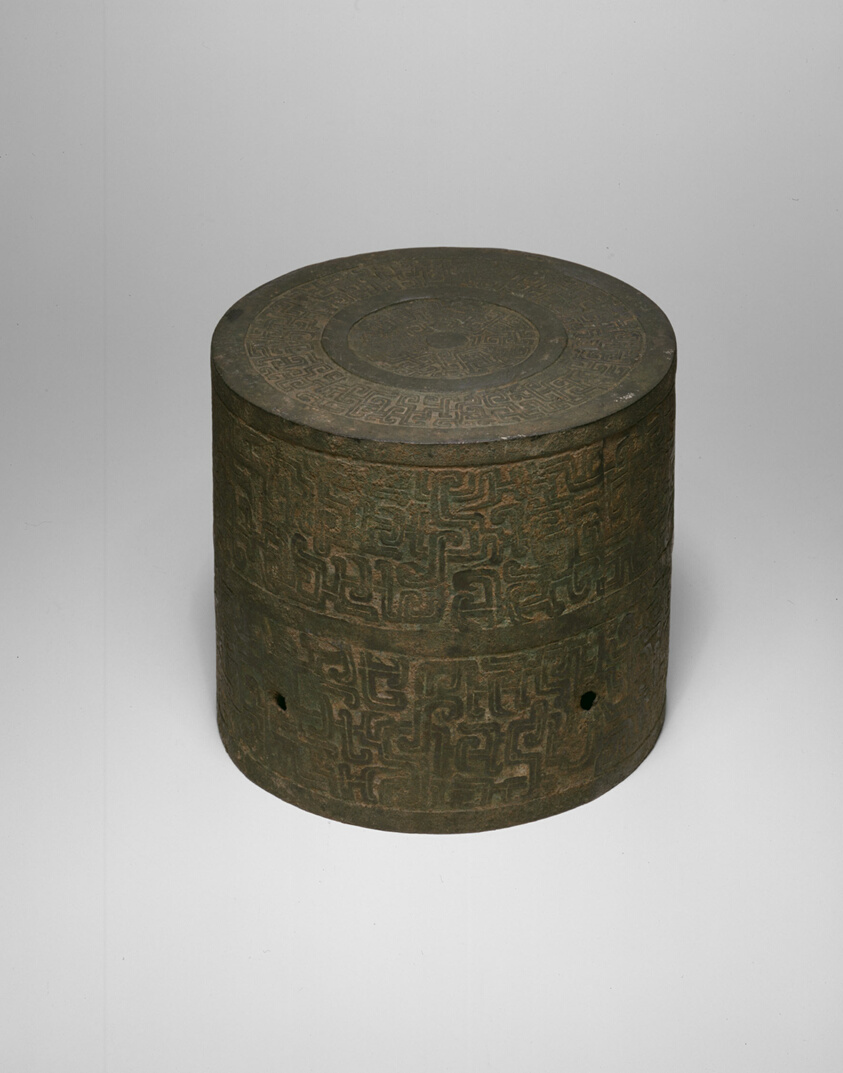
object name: Architectural fragment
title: Architectural Fitting (Gong)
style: Chinese (culture or style)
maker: China, Qishan county, Shaanxi province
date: Eastern Zhou dynasty, Spring and Autumn period (770–481 B.C.), 7th century B.C.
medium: Bronze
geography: China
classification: bronze; architectural fragment